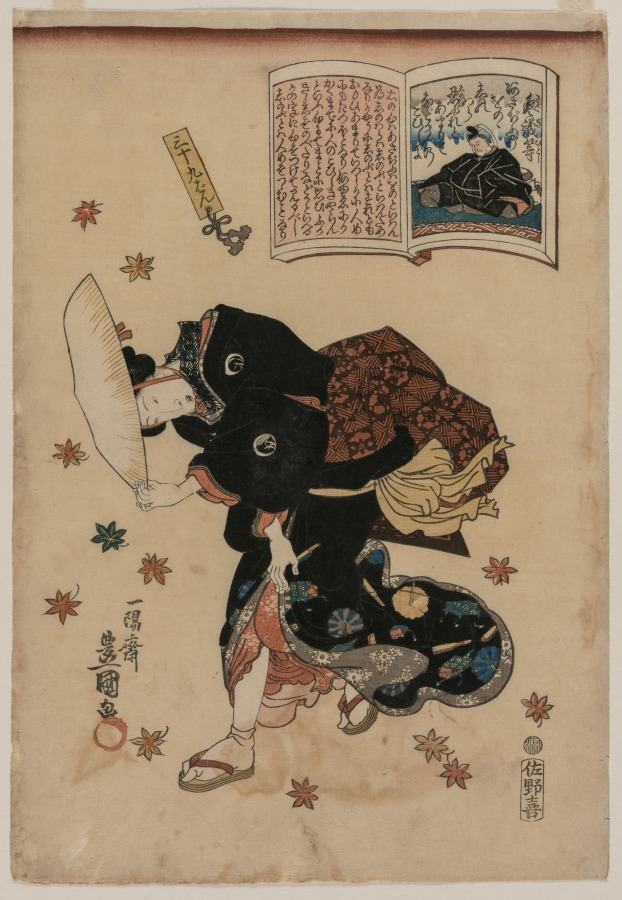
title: Woman Bucking Autumn Wind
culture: Japan, Edo period (1615–1868)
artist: Utagawa Kunisada (Japanese, 1786–1865)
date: 1786–1864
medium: color woodblock print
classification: Print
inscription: Signature: Ichiyosai Toyokuni